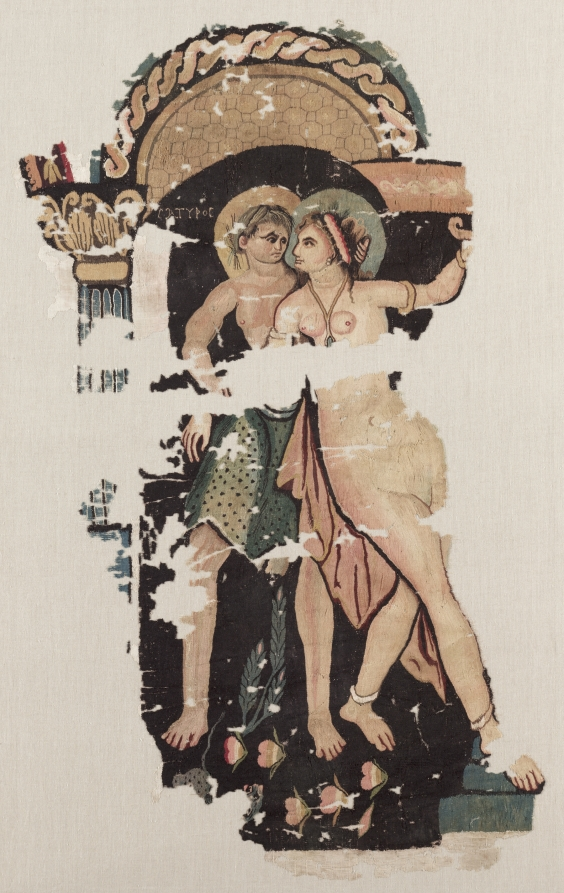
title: Fragment with Satyr and Maenad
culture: Byzantine Empire (Egypt)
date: 300s CE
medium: Linen: undyed; wool: dyed; plain weave ground with tapestry weave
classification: Textile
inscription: the satyr is identified by an inscription above his head.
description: This textile fragment depicts followers of Dionysus, the ancient Greco-Roman god of wine and merriment. A maenad, or female follower, prances in front of columns and archways, nude except for her opulent gold jewelry and pink veil. She gazes at the man, who wears a hair wreath and spotted leopard skin. A Greek inscription beside his halo confirms his identity as a satyr (a male follower). The weaver skillfully blended colors and fibers to produce the illusion of shadows and movement in the two bodies. Though Christianity was the official religion, many pagan motifs endured as creative references.